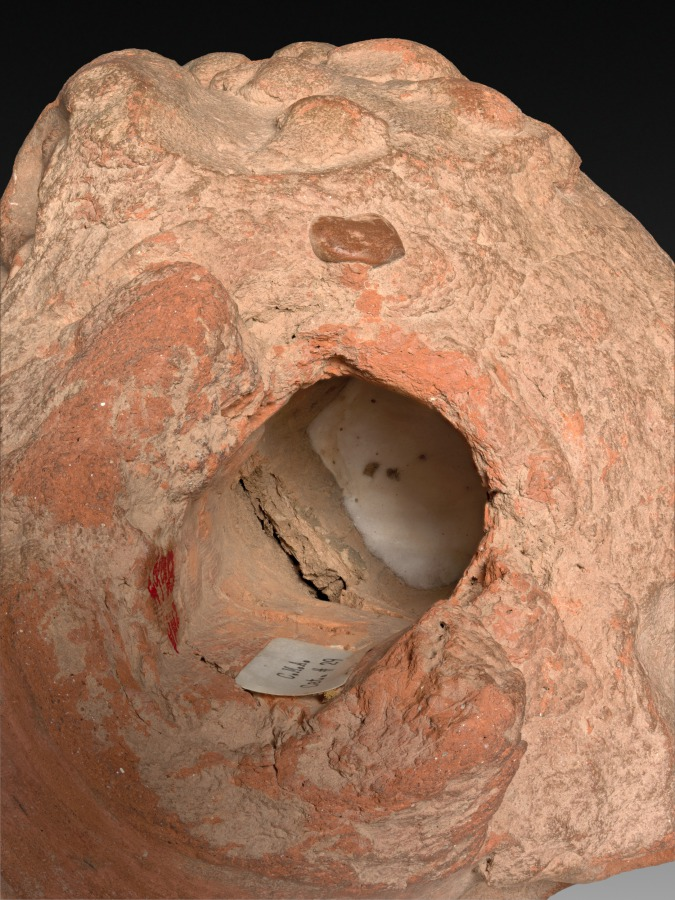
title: Head of Buddha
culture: India, Kashmir, Akhnur school, 8th century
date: 700s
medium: Clay, accidentally burned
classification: Sculpture